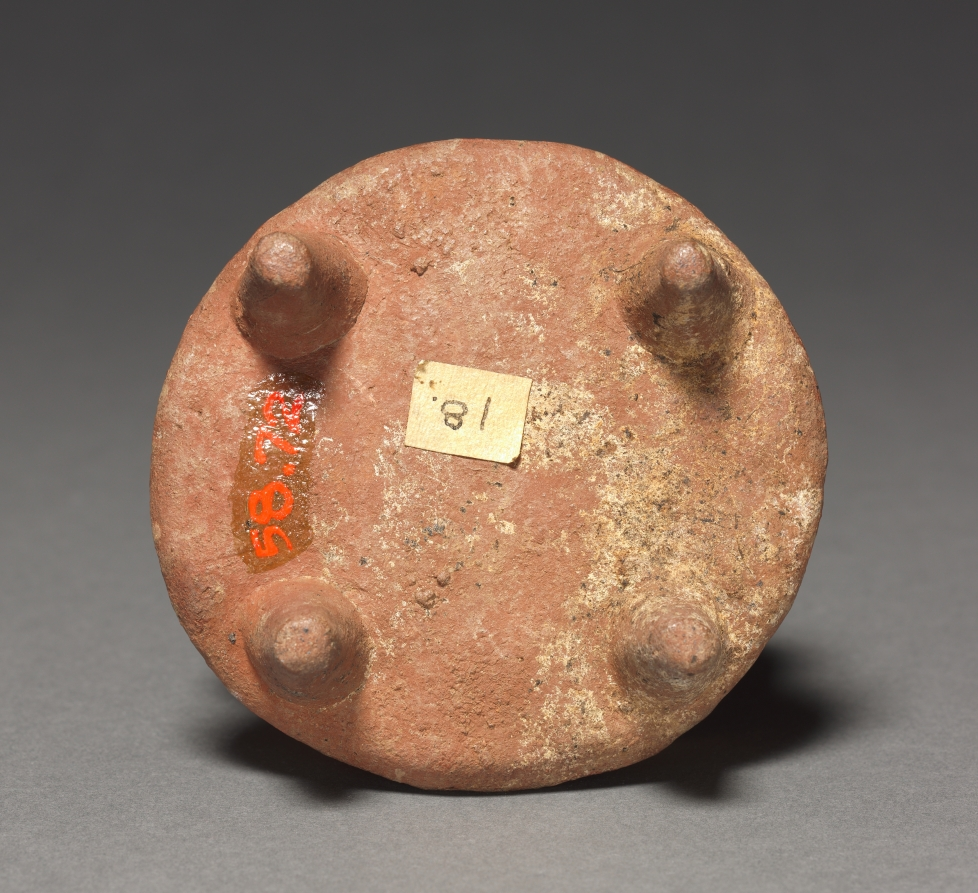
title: Dancing Group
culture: Mexico, Western Nyarit, 5th-6th Century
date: 400s-500s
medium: terracotta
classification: Sculpture